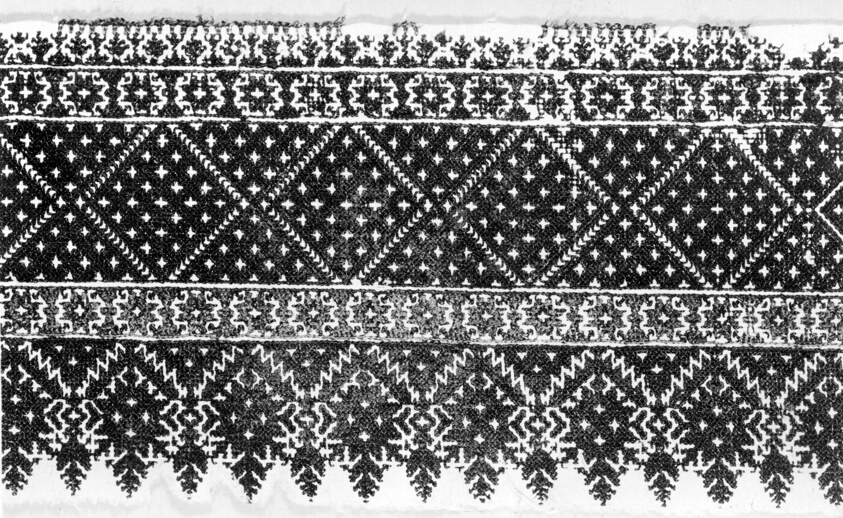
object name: Textile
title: Fragment (Border)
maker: Morocco, Fès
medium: Silk embroidery on plain, cream-colored cotton cloth. Stitch: Holbein-stitch over three threads, stem-stitch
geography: Morocco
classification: textile; needlework (visual works); weaving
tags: morocco